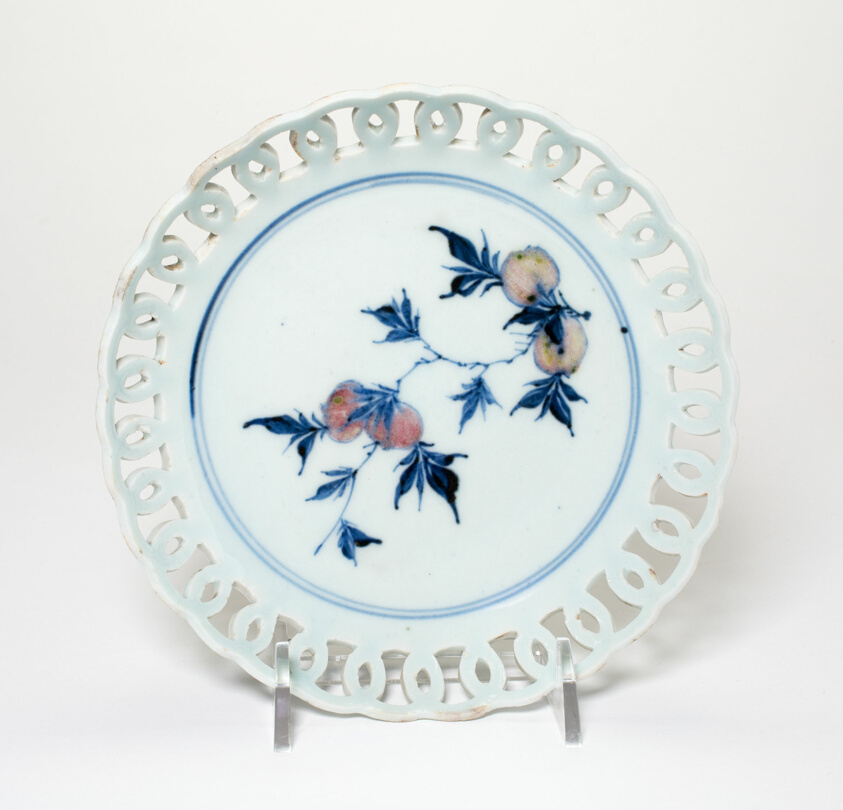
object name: Vessel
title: Dish with Openwork Rim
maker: China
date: Ming dynasty (1368–1644), Tianqi period (1621–27)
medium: Porcelain painted in underglaze blue and copper red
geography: China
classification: porcelain; ceramics; asian art